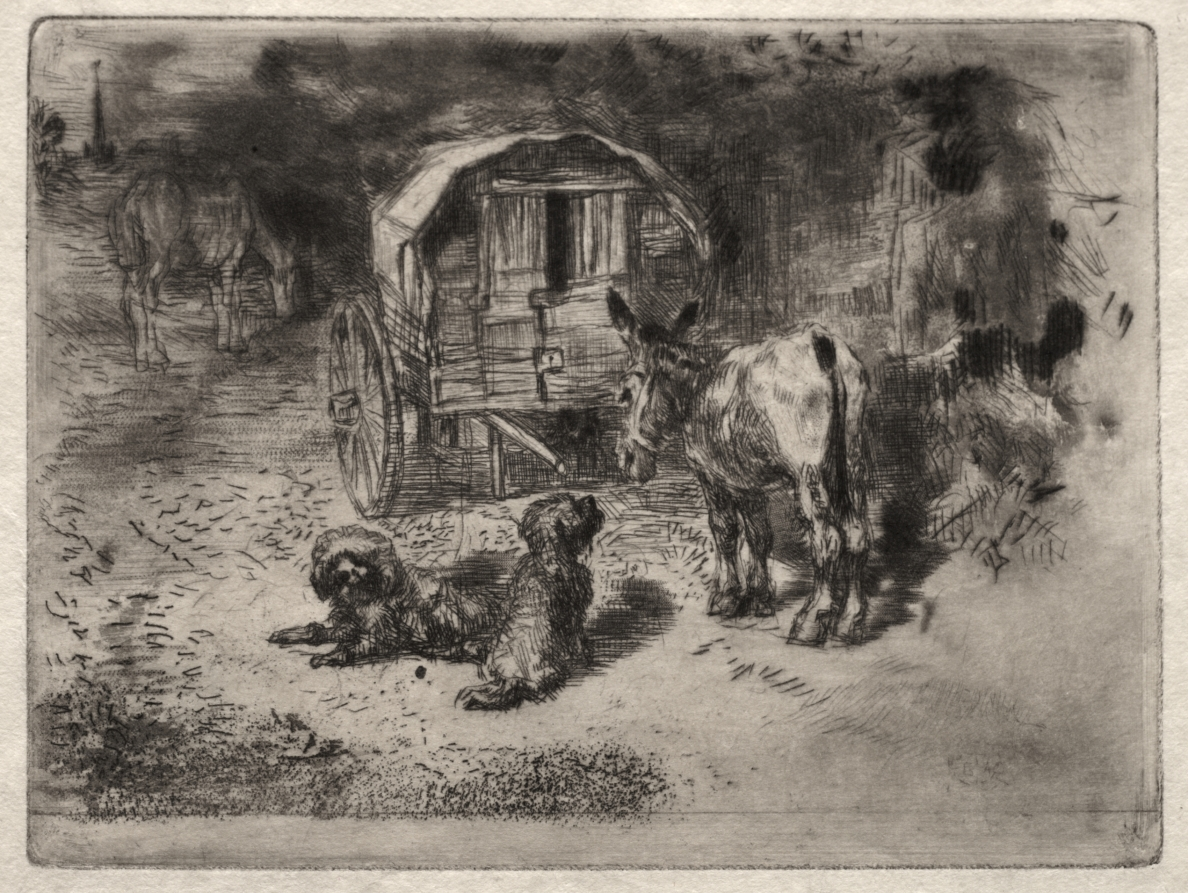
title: The Guardians of the House, or the Friends of the Saltimbanque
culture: France, 19th century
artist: Félix Hilaire Buhot (French, 1847–1898)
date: c. 1875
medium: etching, aquatint, drypoint and roulette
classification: Print